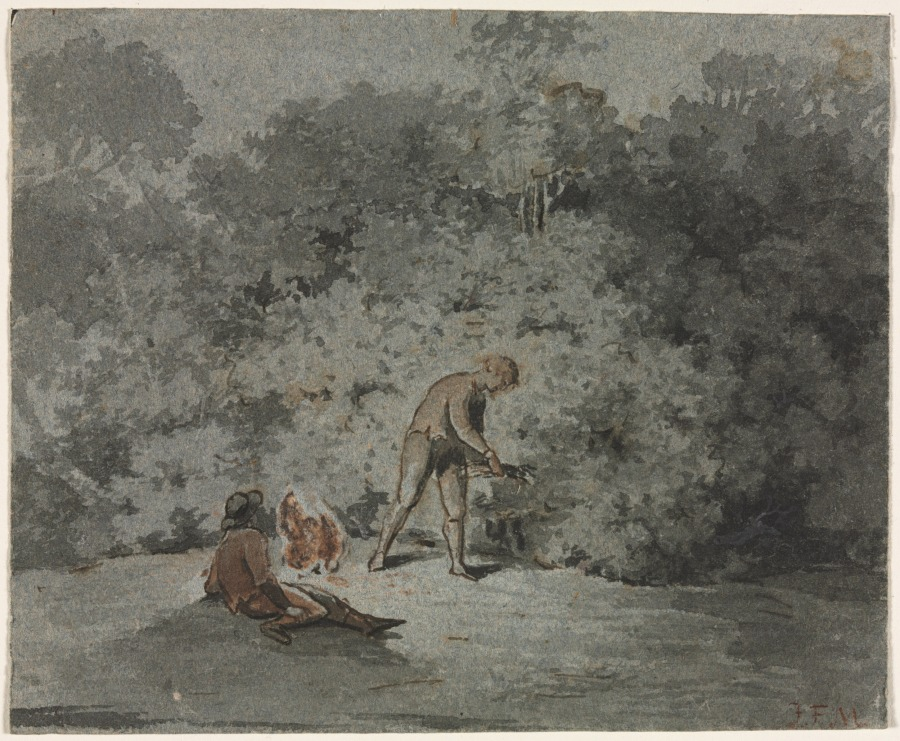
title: Faggot Gatherer (recto) Study of a Head seen from Below (verso)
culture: France, 17th century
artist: attributed to Francisque Millet (French, 1642–1679)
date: third quarter 1600s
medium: pen and brown ink and brush and gray and brown wash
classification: Drawing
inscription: signed, lower right, in brown ink: J.F.M.